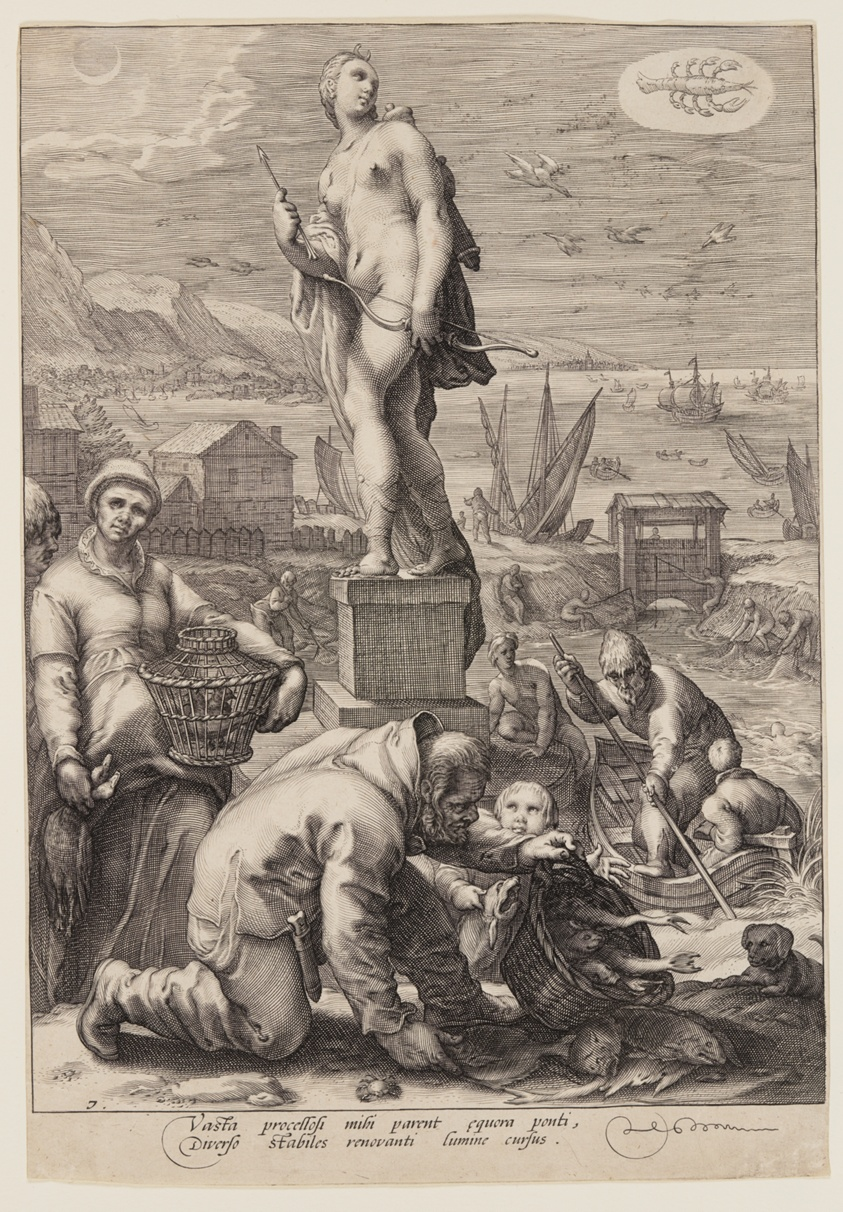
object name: Print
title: Diana Presiding over Navigation and Fishing, from Seven Planetary Gods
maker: Jan Saenredam (Dutch, 1565–1607); after Hendrick Goltzius (Dutch, 1558–1617)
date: 1596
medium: Engraving on ivory laid paper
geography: Netherlands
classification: engraving; paper; print; prints and drawing